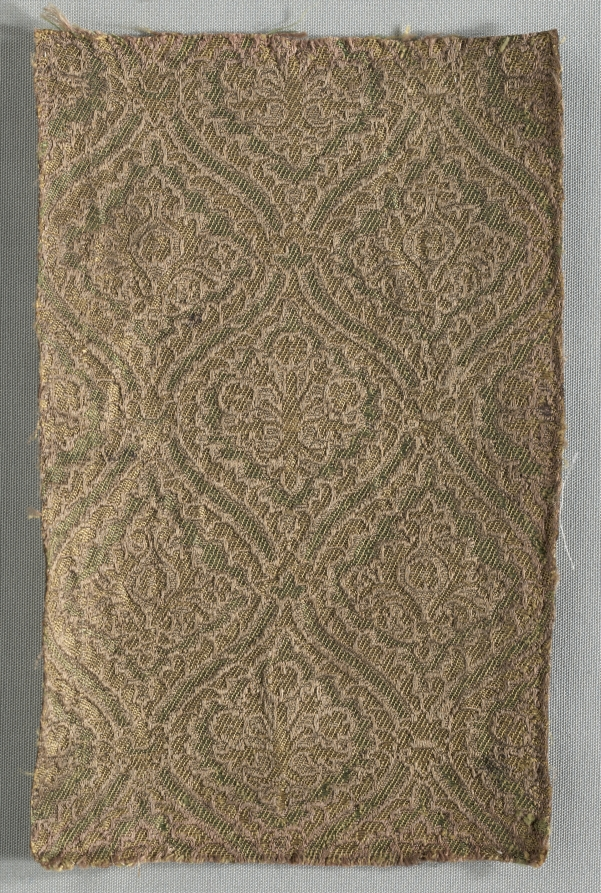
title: Two Brocaded Fragments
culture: Italy, late 16th century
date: late 1500s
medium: lampas weave (?), silk and metal thread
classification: Textile